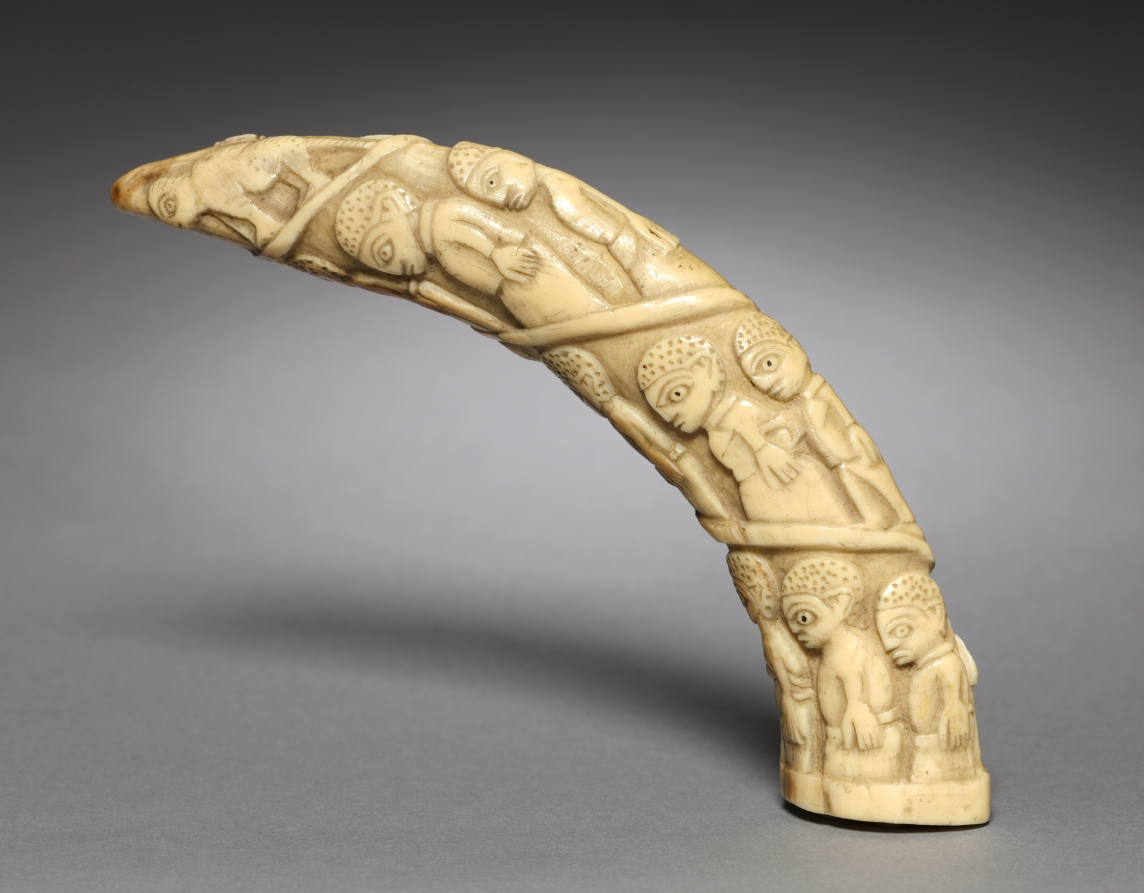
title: Carving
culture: Central Africa, Democratic Republic of the Congo, Kongo, early 20th century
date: c. 1900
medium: ivory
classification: Sculpture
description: Carved elephant ivory tusks and hippopotamus tooth ivory—whether large, or small, like this example—were sought-after souvenirs for Europeans who visited, lived, or worked on the coast of Central Africa. Vili carvers had been sculpting ivory for centuries. In the age of European commerce and colonialism, they created carefully observed tusks with representations of everyday life for European clients. While commissions, they also reflected what the artists chose to represent about their own societies, and sometimes about Europeans. In this small tusk, we see Congolese individuals wearing various clothing, from local-style waist wrappers to European brimmed hats.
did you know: The spiral composition of this artwork has been used on carved ivories in the Kingdom of Kongo since the 1500s.